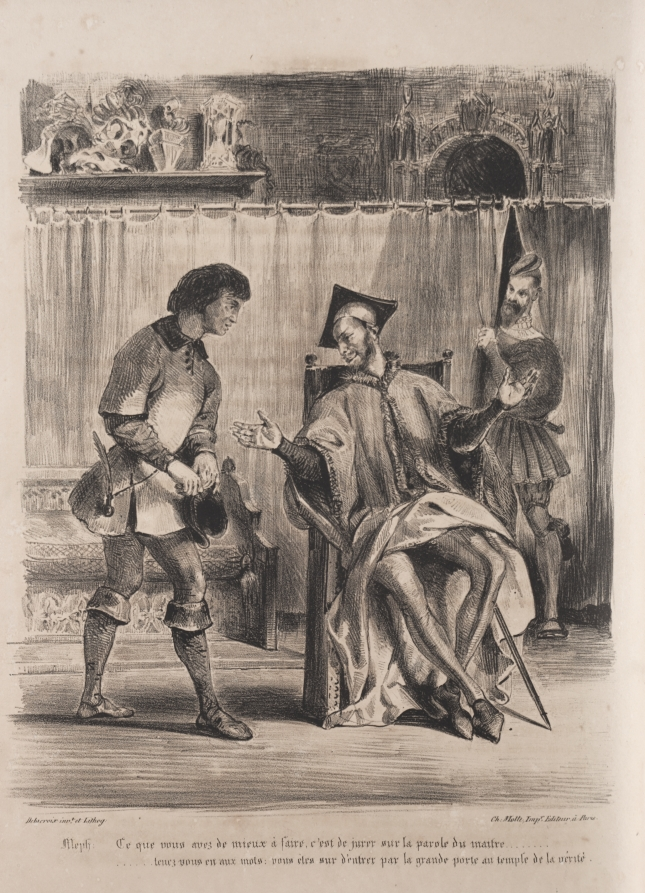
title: Illustrations for Faust: Méphistophélé receives the schoolboy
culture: France, 19th century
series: Faust: Tragédie de M. de Goethe, translated into French by Albert Stapfer.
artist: Eugène Delacroix (French, 1798–1863)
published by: Chez Ch. Motte, Éditeur, distributed by Chez Sautelet, Libraire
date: 1828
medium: lithograph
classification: Print